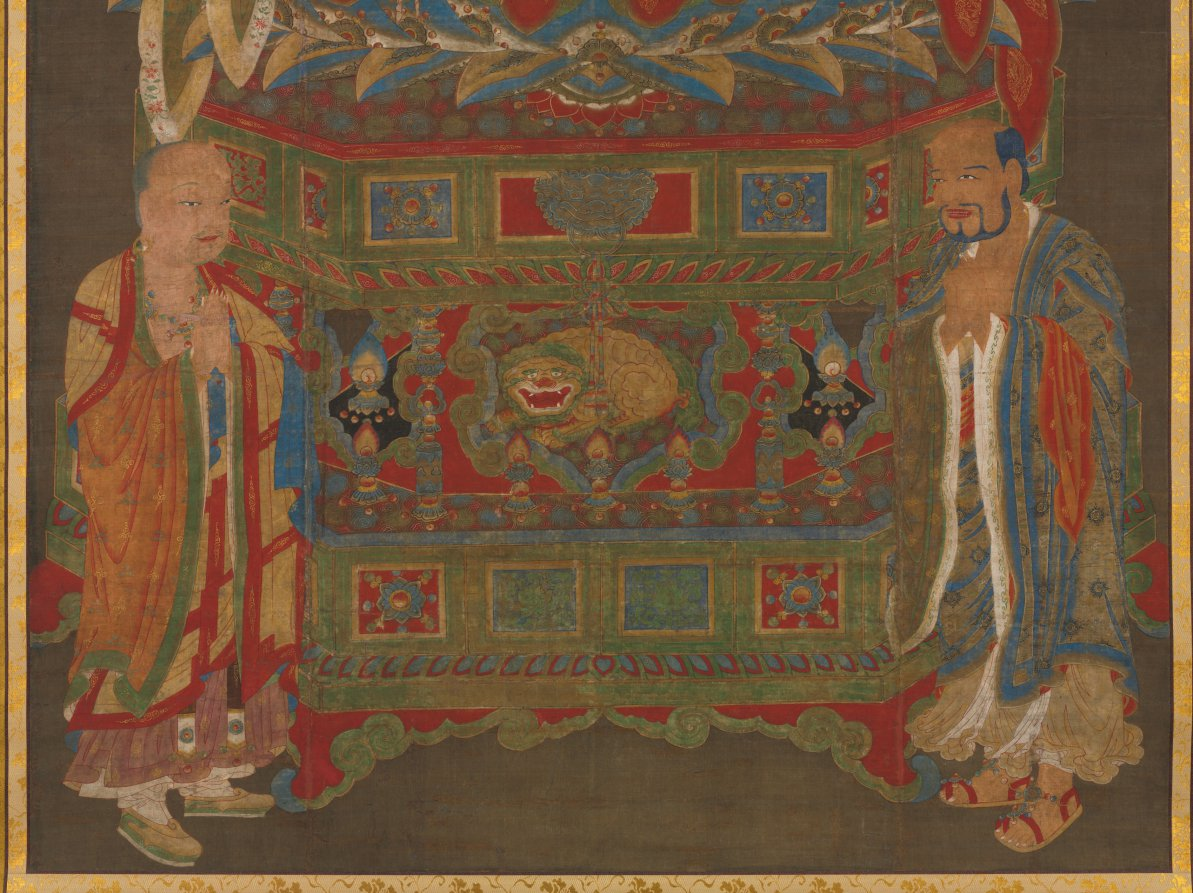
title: Shakyamuni with two attendants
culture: China, Yuan (1271-1368) or early Ming dynasty (1368-1644)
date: 1300s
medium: Hanging scroll; ink, color, and gold on silk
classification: Painting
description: The historic Buddha Shakyamuni is seated on an elaborately decorated pedestal and flanked by two attendants making gestures of devotion. The unknown artist used gold and deeply hued pigments to depict the luxurious fabrics, particularly the golden medallions of swirling dragons and clouds on the Buddha’s red robe. The painting itself is mounted in a Buddhist style with two tiers of fine silk borders. The inner border of gold brocade on a cream background surrounds the painting. The outer border is yellow silk; decorative silk strips, called futai, dangle from the top hanging bar.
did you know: This painting was made on 3 vertical panels of silk stitched together. The joins are visible just outside of Shakyamuni's left and right shoulders.